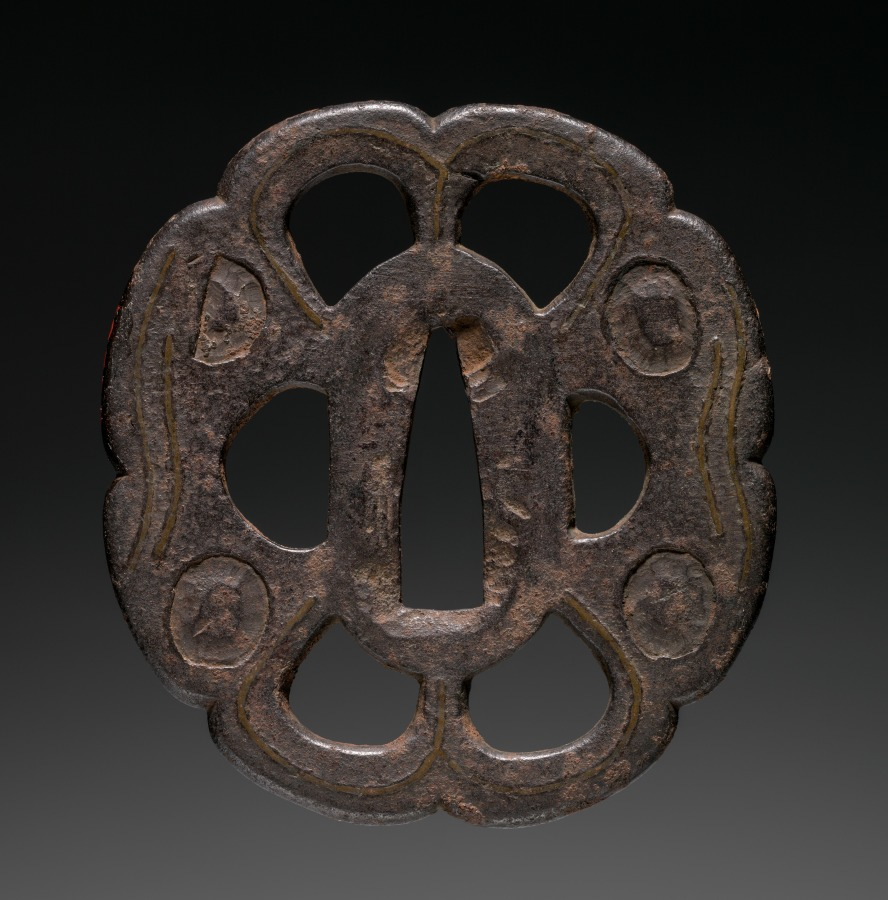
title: Sword Guard (Tsuba)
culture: Japan, Edo period (1615–1868)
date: 1800s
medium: iron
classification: Arms and Armor